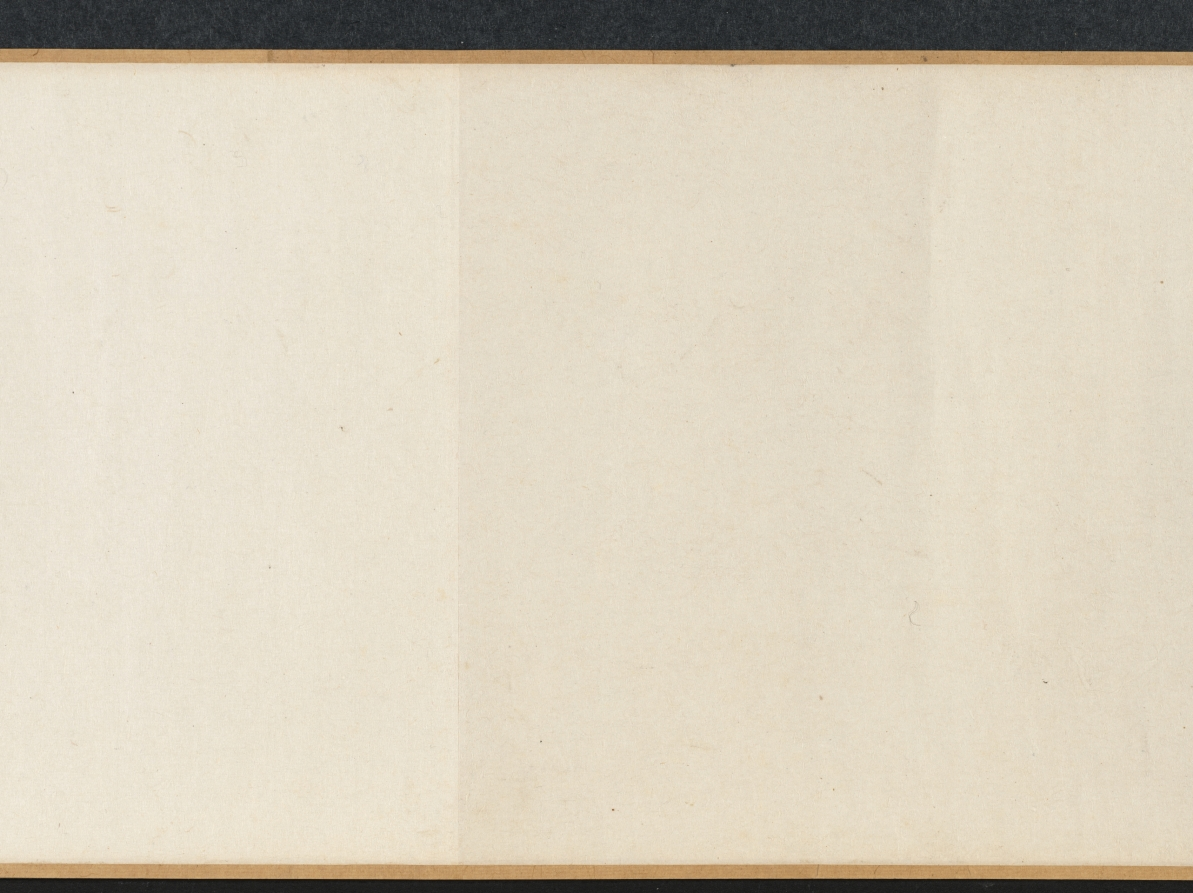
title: Zhao Mengfu Writing the Heart (Hridaya) Sutra in Exchange for Tea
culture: China, Ming dynasty (1368–1644)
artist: Qiu Ying (Chinese, 1494–1552)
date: 1542–43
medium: handscroll, ink and light color on paper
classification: Painting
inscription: Inscription accompanying text of "Heart" sutra, by Wen Zhengming 文徵明 (1470-1559): Zhengming 徵明, written in a boat at Kunshan 崑山, on the twenty-first day of the ninth month, in the renyin 壬寅 year, the twenty-first year of the Jiajing era [1542].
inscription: Colophon by Wang Shih-mou: Chou Yü-shün [Feng-lai] of K'un-shan was a scholarly, refined connoisseur of antiquities. He had acquired the poem written by Chao Ch'eng-chih [Chao Meng-fu] about the exchage of tea for Chao's calligraphy of the Prajna sutra. But the sutra itself, also written by Chao Meng-fu, is lost. He therefore asked Ch'iu Shih-fu [Ch'iu Ying] to do a painting and had Wen Cheng-ming, the artist-in-attendance, write the Hridaya Sutra in the "small, regular" style for replacement. Both works are so excellent that even Chao Meng-fu himself would certainly applaud if he should be reborn to see them. I, Shih-mou, had gotten possession of this scroll from the family of Chou Yü-shün, and since it was so wonderfully matched with one of the treasures in my collection. the Hridaya Sutra written by Chao Meng-fu for Priest Li in "running script," like the reuniting of two halves of a jade pi, I completed the scroll with the several colophons written for the "tea-exchange" poem. I did this because the painting of Ch'iu Ying and the calligraphy of Wen Cheng-ming are definitely masterpieces by themselves with absolutely no need to depend on any of the colophons written for the Chao Meng-fu poem. Furthermore, the two sons of Wen Cheng-ming, Shou-ch'eng [Wen P'eng] and Hsiu-ch'eng [Wen Chia]. have each written a colophon explaining the reason for replacing the calligraphy. As their writings are both acceptable for high standard, I didn't want to throw them away. [So by separating these into two scrolls] I was able to get two complete works of art in one clever stroke. I was quite pleased with myself, and hope that those who see this scroll shall not get suspicious because of the missing colophons. Wang Shih-mou wrote in his Jih-sun-chai study, on the first day of the tenth month, in the chia-shen year of the Wan-li era [1584].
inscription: Colophon by Wen P'eng: I-shao [Wang Hsi-chi] wrote in exchange for a flock of geese. Su Tung-po wrote in exchange for meat. Both episodes have become legends of a thousand years. Sung-hsüeh [Chao Meng-fu] "teased" Priest Kung for tea, and the story was immediately immortalized in the poems by all the famous scholars of the times. Indeed, how could one say his humor and elegance are not equal to the ancient worthies? Unfortunately, the poetry has survived but the writing of the sutra is lost. Yü-shün [Chou Feng-lai] therefore asked my father to make up the writing and so here is the complete work of art. Respectfully inscribed by Wen P'eng in the mid-summer of 1543.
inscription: Colophon by Wen Chia: Sung-hsüeh [Chao Meng-fu], in exchanging tea leaves for his writing of the Prajna, had put himself in the company of Yu-chün [Wang Hsi-chih] who exchanged geese for his writing of the Huang-t'ing sutra [the Yellow Chamber, or the Wai-ching ching, a Taoist text attributed to the Yellow Emperor]. However, was this romantic and cultivated gesture really intended for such small things? Actually, he was only proud that the excellence of his calligraphy had made him worthy to be the successor of the Ch'in Dynasty master. Since, very unfortunately, Chao Meng-fu's writing [of the Prajna] was already lost, my father therefore agreed to replace it, and did the calligraphy in the style of the Yellow Chamber. In addition, Yu-shün [Chou Feng-lai] had asked Mr. Ch'iu Shih-fu [Ch'iu Ying] to do a painting of the sutra writing story in the style of Li Lung-mien at the head of the scroll. Now it would seem the entire episode should go down in history for immortality. Respectfully recorded by Wen Chia, on the eighth day of the eighth month, in the year of k'uei-mao [1543]. trans. WKH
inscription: 4 colophons and 23 seals: 1 colophon, dated 1543, and 2 seals of Wen Peng (1498-1573); 1 colophon, dated 1543, and 2 seals of Wen Chia (1501-1583); 1 colophon, dated 1584, and 3 seals of Wang Shih-mou (1536-1588); 2 seals of Chou Feng-lai (16th c.); 3 seals of Sung Lo (1634-1713); 5 seals of the Ch'ien-lung emperor (r. 1736-95); 1 colophon, dated 1902, and 1 seal of Fei Nien-tz'u (1885-1905); 4 seals of Wan-go H. C. Weng (b. 1918); 1 seal unidentified.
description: The Yuan dynasty calligrapher Zhao Mengfu (1254–1322) is said to have transcribed the Heart Sutra for a certain priest named Li in exchange for tea. Later, during the Ming dynasty, the professional painter Qiu Ying from Suzhou painted this scene for his patron. Here, Zhao Mengfu holds a brush and has a piece of paper laid out before him. On the table is an ink stone, an ink stick, and a small water dropper. Drops of water would dissolve the ink stick into liquid ink when it was ground on the flat square stone.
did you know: Qiu Ying was born to a peasant family, but his natural talent led him to a successful career as a professional painter with wealthy patrons.